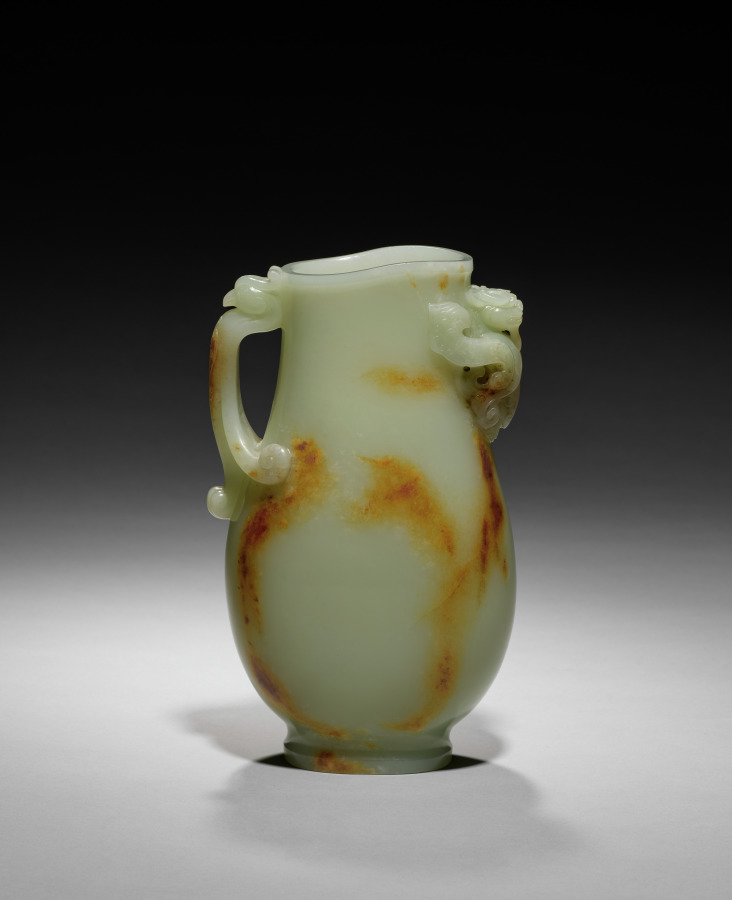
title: Pitcher (Gong) with Dragon and Bird-Headed Handle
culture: China, Qing dynasty (1644–1911)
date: 1700s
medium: pale greenish-white jade with brown markings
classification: Jade